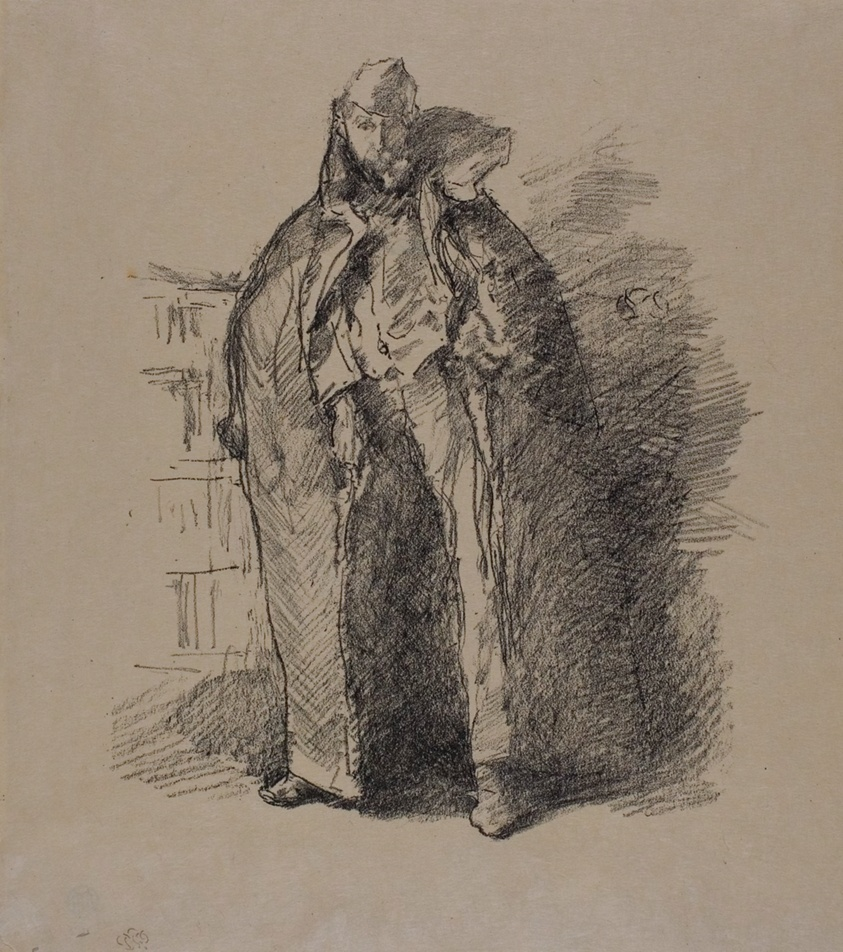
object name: Print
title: The Russian Schube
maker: James McNeill Whistler (American, 1834-1903)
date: 1896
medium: Transfer lithograph in black with scraping, on tan laid Japanese vellum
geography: United States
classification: transfer lithograph; lithograph; print; prints and drawing